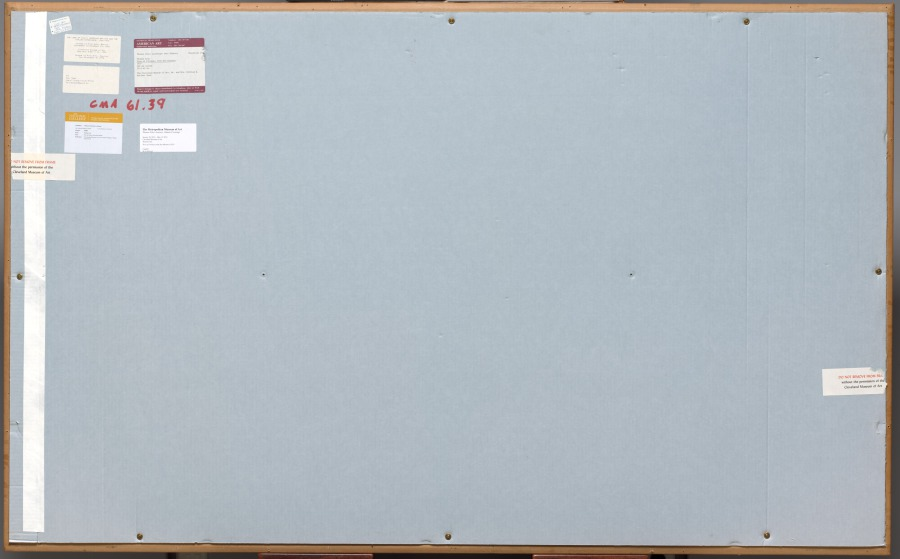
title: View of Florence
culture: America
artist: Thomas Cole (American, born England,1801–1848)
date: 1837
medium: oil on canvas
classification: Painting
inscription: Signed lower right: "T C"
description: Cole visited Italy in 1831 and made a small pencil sketch of this vista of Florence shortly before sunset. In his New York studio six years later, he transformed the drawing into this large oil painting, adding picturesque humans and goats to the foreground. Exhibiting View of Florence alongside a painting of the Catskill Mountains in New York in 1837, Cole set out to prove that he had mastered the very different landscapes of the Old and New Worlds.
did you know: Novelist Henry James grew up with this painting and described its foreground monk as his “constant friend.”